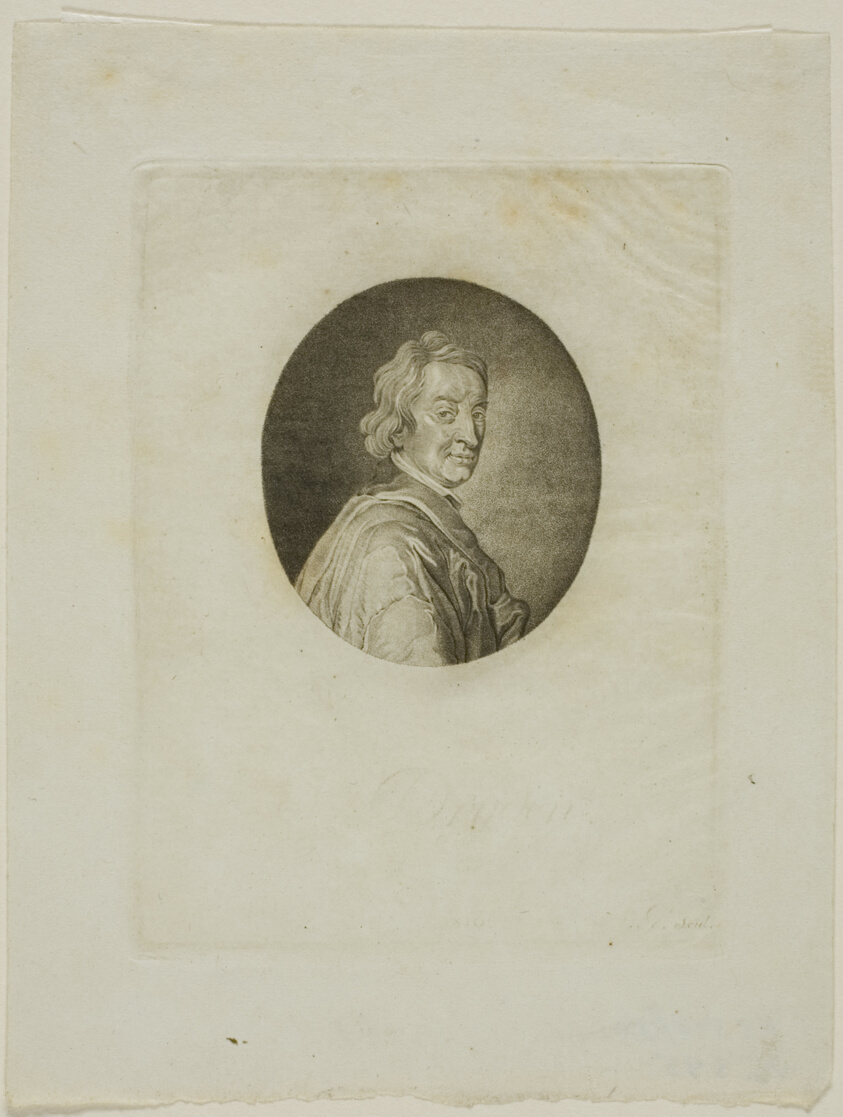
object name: Print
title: John Dryden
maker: Jean-Baptiste de Grateloup (French, 1735-1817); Jean Pierre Sylvestre (French)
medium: Engraving on paper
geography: France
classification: aquatint; print; prints and drawing